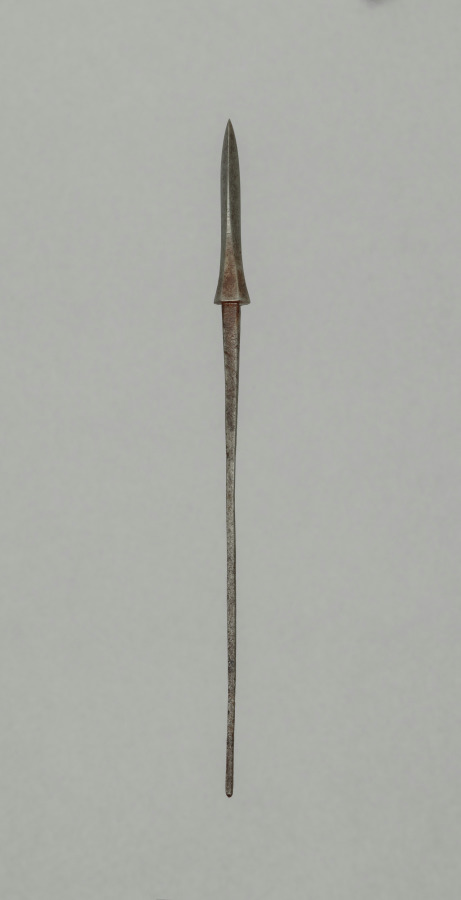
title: Arrow Point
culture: Japan, Edo period (1615–1868)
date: 1700s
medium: steel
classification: Arms and Armor